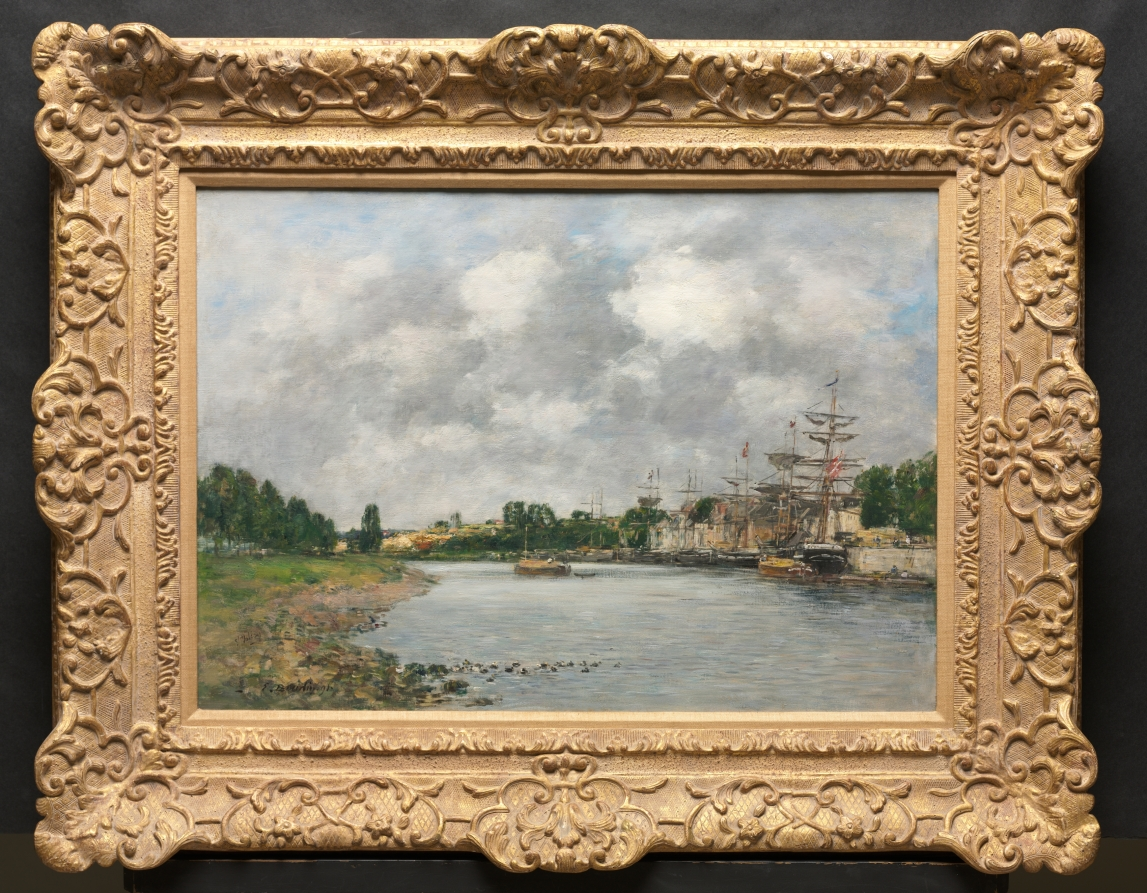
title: View of the Port of Saint-Valéry-sur-Somme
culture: France, 19th century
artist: Eugène Boudin (French, 1824–1898)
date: 1891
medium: oil on canvas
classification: Painting